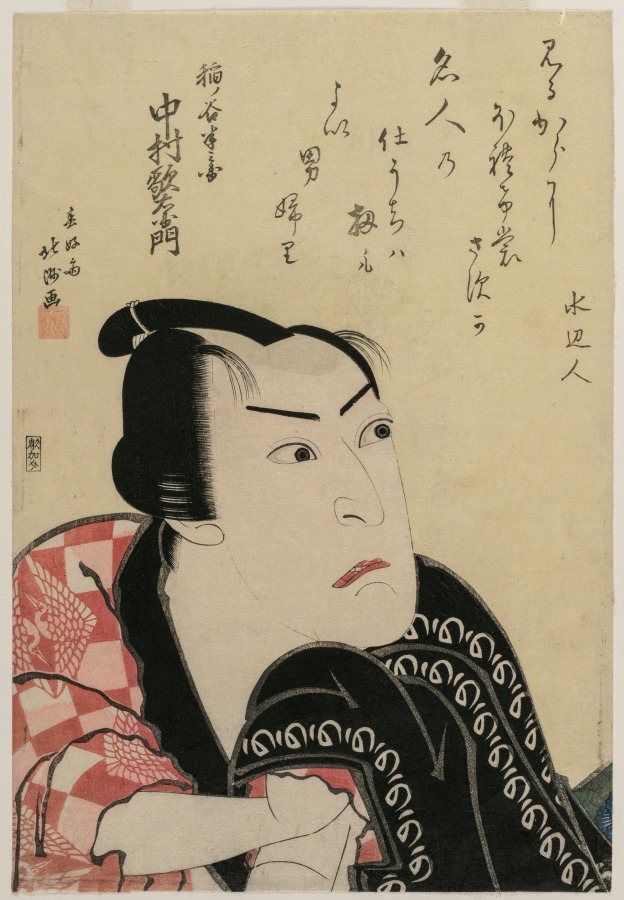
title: Nakamura Utaemon as Inanoya Hanbei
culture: Japan, Edo period (1615–1868)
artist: Shunkōsai Hokushū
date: c. 1822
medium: color woodblock print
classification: Print